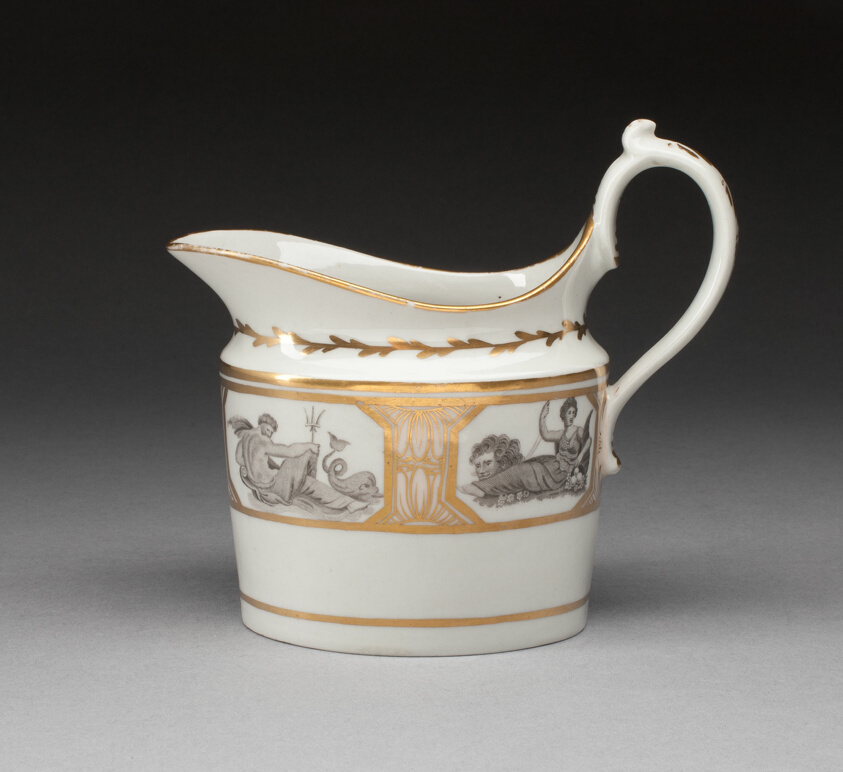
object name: Ceramics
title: Creamer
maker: Worcester Porcelain Factory (Flight & Barr Period, 1792–1804); Worcester, England, founded 1751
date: c. 1800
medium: Soft-paste porcelain with monochrome gray and gilding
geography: Worcester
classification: teaware; porcelain; european decorative arts; ceramics